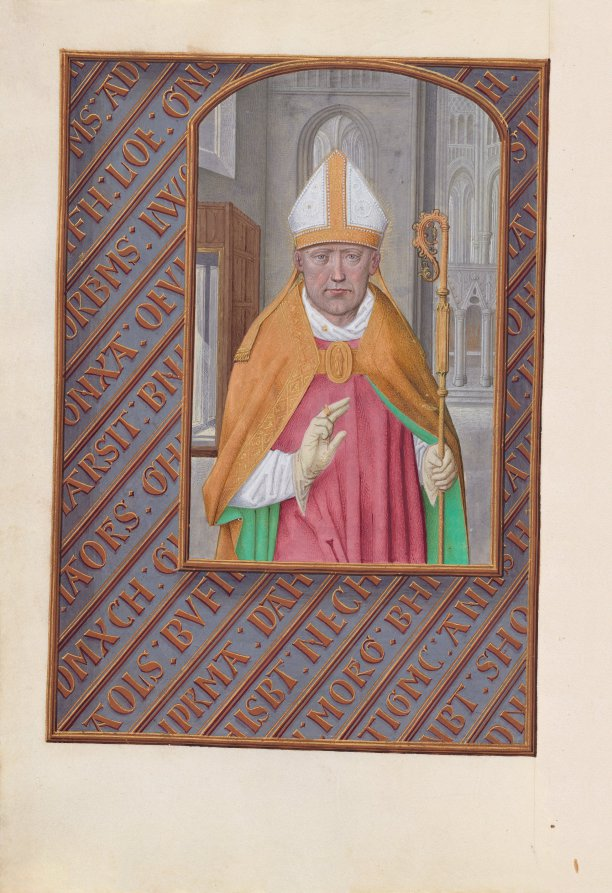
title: Hours of Queen Isabella the Catholic, Queen of Spain: Fol. 183v, St. Nicholas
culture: Flanders, Ghent and Bruges, late 15th century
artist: Master of the First Prayerbook of Maximillian (Flemish, c. 1444–1519)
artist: and Associates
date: c. 1500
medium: ink, tempera, and gold on vellum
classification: Bound Volume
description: This manuscript was illuminated by a circle of at least five highly organized manuscript painters active in the Flemish cities of Ghent and Bruges. The principal illuminator was Alexander Bening, who painted the majority of the book's miniatures. Manuscripts produced by this circle of artists are renowned for the decoration of their borders, which typically feature a rich variety of realistically-painted flowers, birds, and butterflies. This prayer book, called a book of hours, was intended not for a cleric, but for the private devotions of a lay person-in this case, Isabella the Catholic, Queen of Spain (1451-1504). Isabella's coat of arms embellishes the book's frontispiece. It is unlikely that the book was commissioned by the Queen herself; rather, she probably received it as a diplomatic gift from someone courting her patronage, perhaps Cardinal Francisco Jimenez de Cisneros. A Franciscan friar, Jimenez was dependent upon Isabella for his advancement, first to the post of Queen's confessor in 1492, and then to Archbishop of Toledo in 1495.